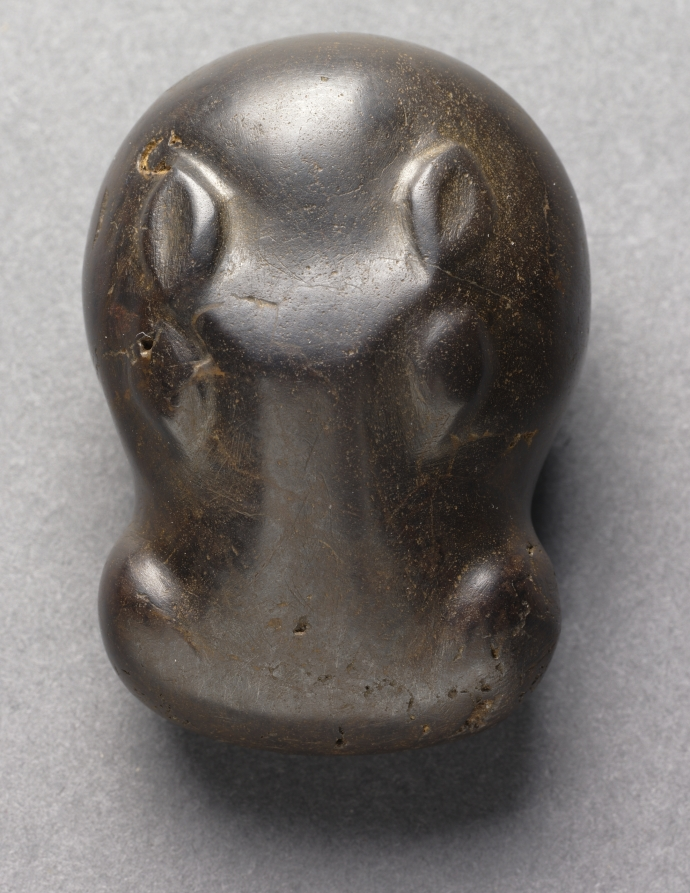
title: Weight in the Form of a Hippopotamus Head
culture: Egypt, New Kingdom (1540–1069 BCE), Dynasty 18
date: c. 1540–1296 BCE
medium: hematite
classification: Implements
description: Sensuously carved and polished to a silky luster, this weight takes the form of a hippopotamus head. Eyes, ears, and nostrils ae modeled in relief; the mouth is closed. The flat underside provides a surface on which to rest the object. This hippo head weighs 62.1 grams, roughly three-quarters of a deben, a unit of weight in ancient Egypt. As such it does not correspond to any of the more usual subdivisions of the deben, although similar examples are known. In fact it is an inter-standard weight, representing eight seniu or two-thirds of a deben, and is equivalent of an Aegean unit of 62.1 grams.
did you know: The word hippopotamus comes from the ancient Greek for "river horse" (ἱπποπόταμος).